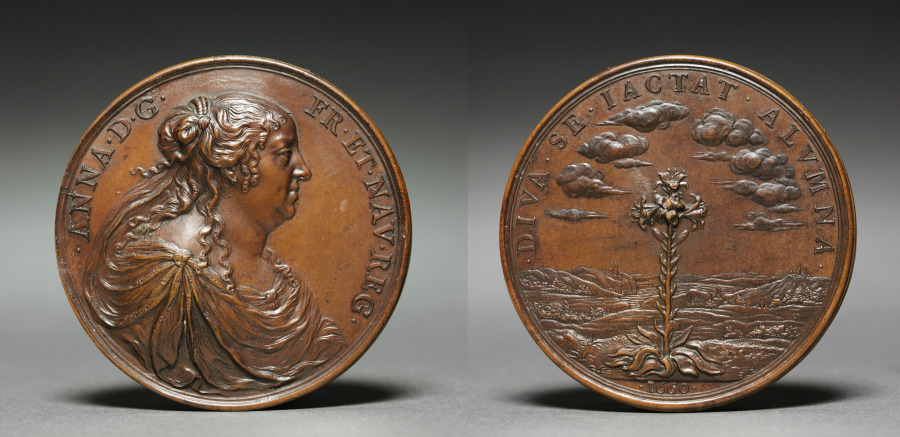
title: Medal of Anne of Austria (obverse) and (reverse)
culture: France, 17th century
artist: Jean Warin (French, 1604–1672)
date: 1660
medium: bronze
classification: Sculpture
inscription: Obverse: .ANNA.D.G. FR.ET.NAV.REG. Reverse: .DIVA.SE.IACTAT.ALVMNA. .1660.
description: Jean Warin was the foremost medalist in 17th-century France. As the chief designer of coins, his relationship with King Louis XIII was exceptionally close; he convinced the king that commemorative medals were the most important artistic medium for propaganda. Warin revolutionized the production of medals by introducing the raised edge, allowing greater ease in striking medals. This change fueled the shift from casting medals to the more recently invented process of striking, or pressing medals from a die. This work is one of many he composed of Queen Anne of Austria (1601–1666). Although she was born in Spain as the Infanta, or princess, of Spain and Portugal, her title "of Austria" refers to her Habsburg heritage as well as her title of Archduchess of Austria. The reverse depicts a blooming lily, a symbol of France, and is inscribed "it glories in its divine nourishment," referring to her son, the adolescent King Louis XIV.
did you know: This medal contains both a traditional portrait as well as a symbolic depiction of another individual.